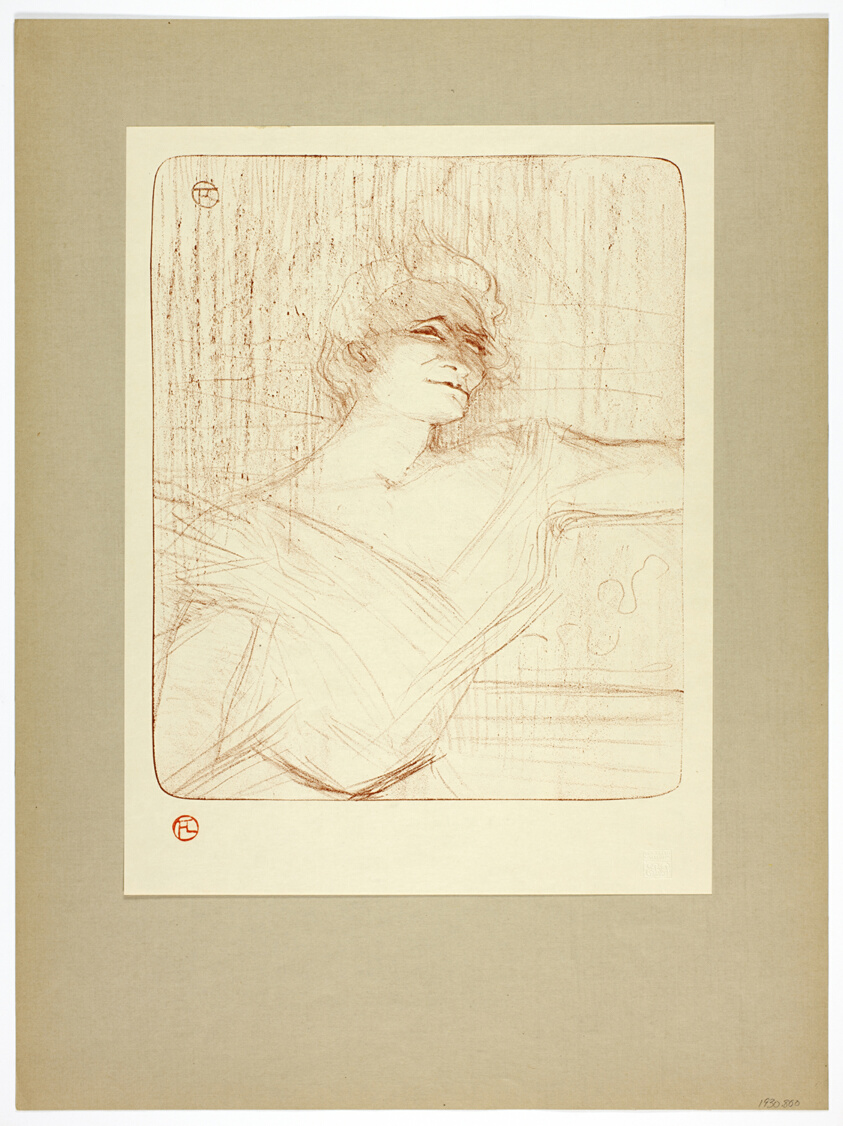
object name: Print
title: Dans la glu, plate two from Yvette Guilbert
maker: Henri de Toulouse-Lautrec (French, 1864-1901); printed by Westminster Press (English, 20th century); published by the Ernest Brown & Phillips (English, 20th century)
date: 1898, printed 1930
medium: Lithograph (crayon) in sanguine (red-brown) on cream wove paper hinged at top corners to gray-brown wove paper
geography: France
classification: lithograph; print; prints and drawing